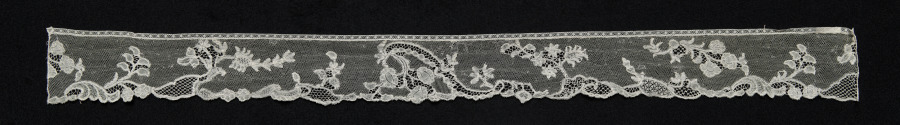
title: Lace Edging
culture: Belgium, Brussels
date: 1700s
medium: Linen: bobbin lace (Point d'Angleterre)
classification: Lace